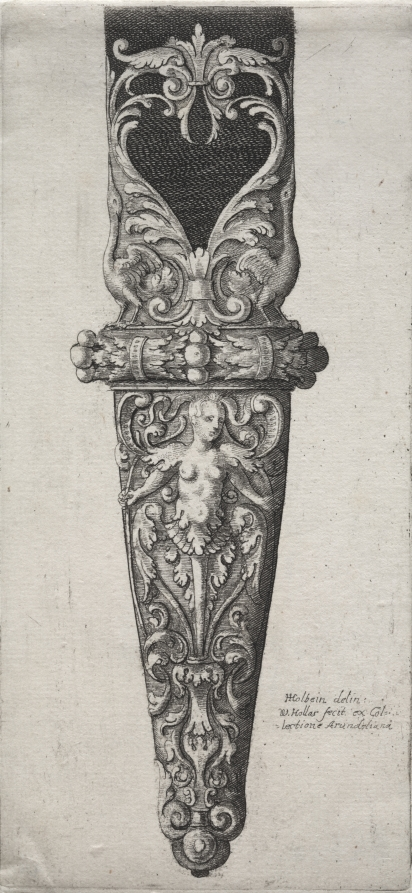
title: Design for Dagger Sheath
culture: Bohemia, 17th century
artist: Wenceslaus Hollar (Bohemian, 1607–1677)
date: mid-1600s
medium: etching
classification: Print